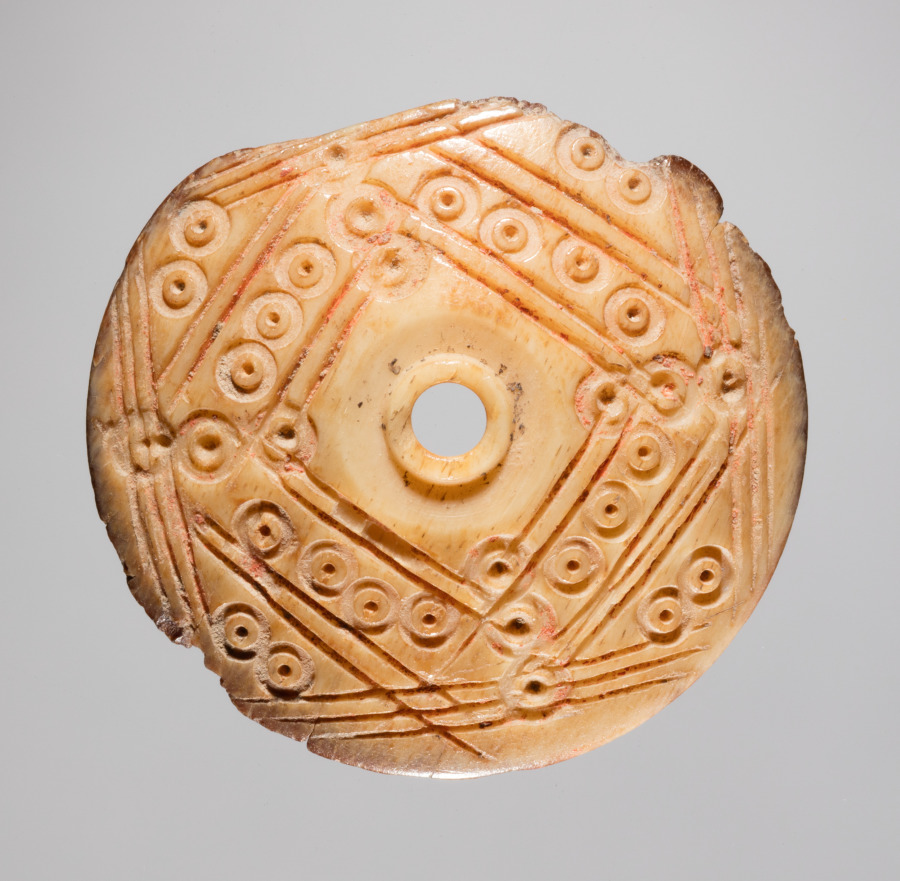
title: Spindle Whorl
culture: Iran, early Islamic period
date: 700s - 900s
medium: bone, incised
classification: Spindle Whorl